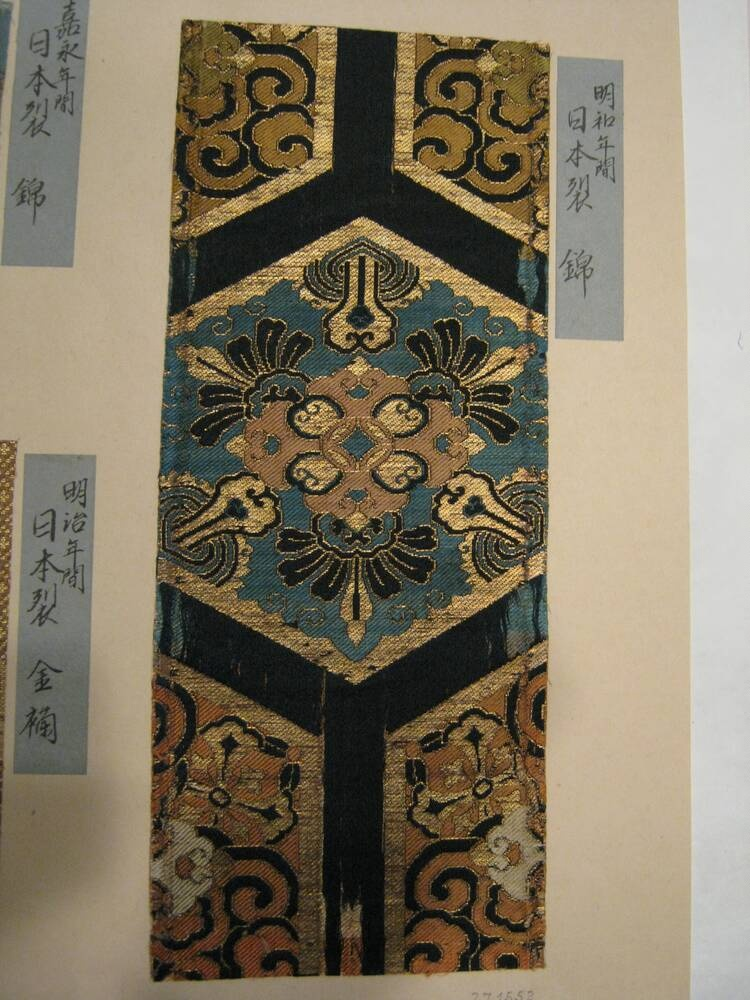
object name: Textile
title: Fragment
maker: Japan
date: 18th century, late Edo period (1789–1868)/ Meiji period (1868–1912)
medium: Plain compound satin, silk & gilt paper; 3 strips to m.m.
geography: Japan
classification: textile; weaving